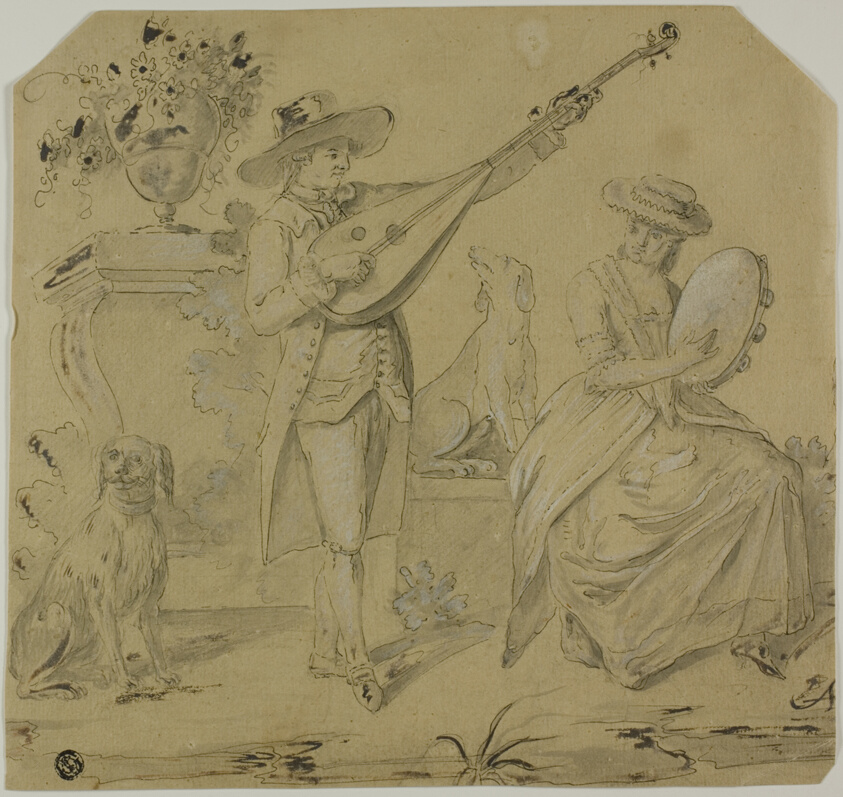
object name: Drawing and Watercolor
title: Man Playing Lute and Woman Playing Tamborine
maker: Unknown Artist; Italian, 18th century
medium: Pen and black ink, with brush and gray wash, heightened with lead white (discolored), over graphite, on tan laid paper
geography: Italy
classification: pen and ink drawings; drawings (visual works); prints and drawing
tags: dogs, animals